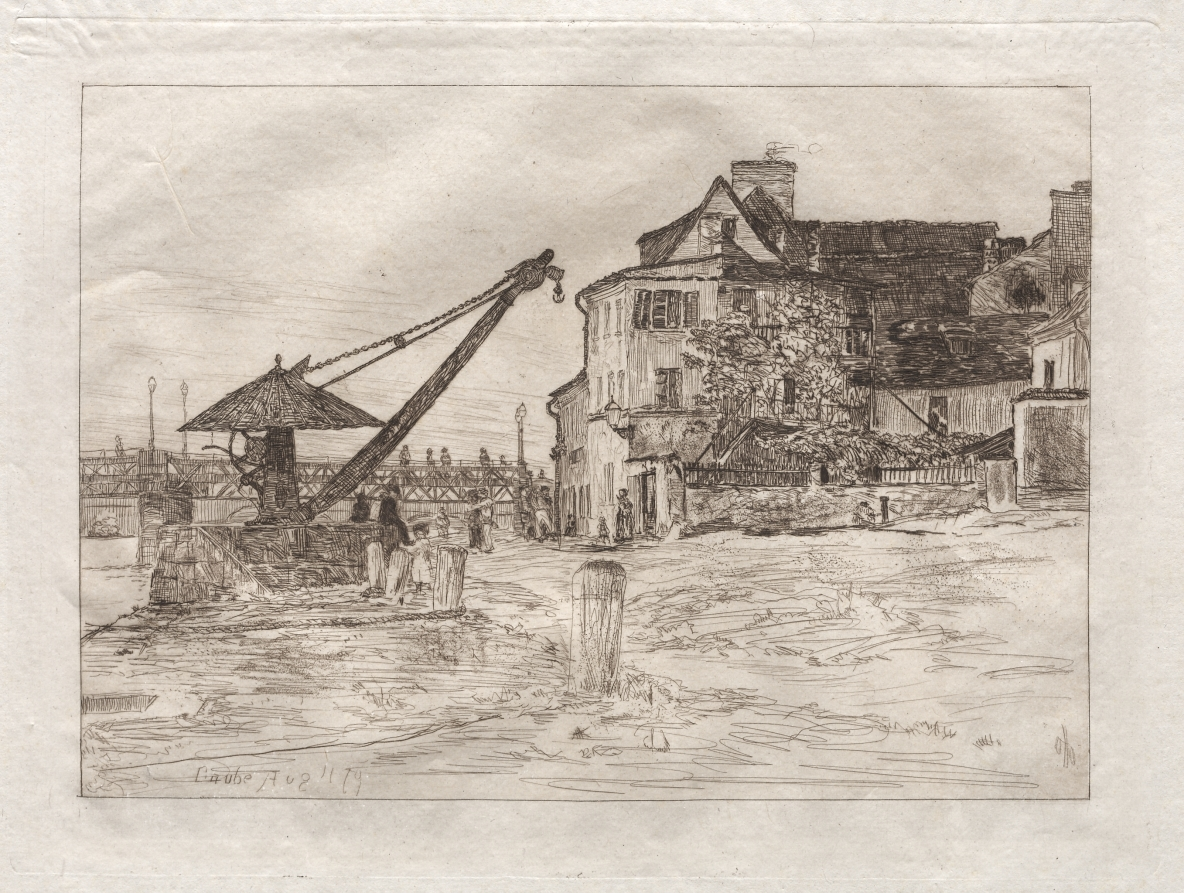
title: Gaube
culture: America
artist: Otto H. Bacher (American, 1856–1909)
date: 1879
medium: etching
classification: Print